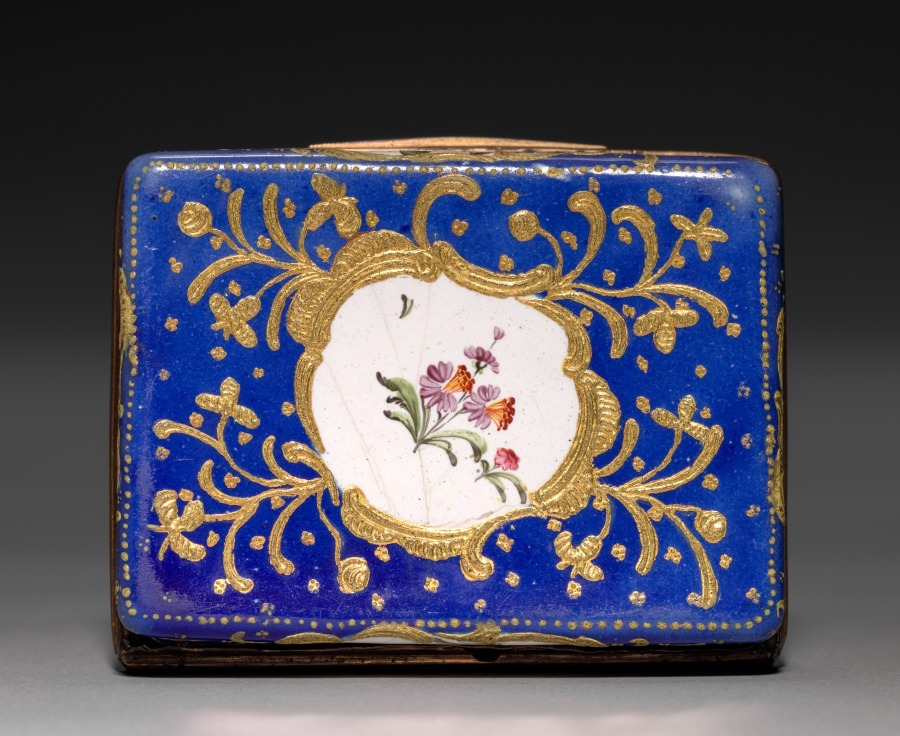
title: Snuff Box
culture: England, South Staffordshire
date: c. 1770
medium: enamel on copper, gilt metal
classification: Miscellaneous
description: Luxurious personal objects, like this snuff box, were an essential part of a privileged wardrobe during the 1700s and early 1800s, emphasizing their owner’s refinement and wealth. Their glittering surfaces, however, disguised a system based on the labor and suffering of enslaved or indentured people, whether in gold or stone mines, tobacco farms, or shops where these goods were made. Like cotton, sugar, and tea, snuff came from British colonies in America, India, and the Caribbean, where enslaved people were exploited to grow these crops under extremely harsh conditions. Slavery was not abolished in much of the British Empire until 1833. Britain and other European nations continued to pursue colonialism with a sense of superiority that found its way into all aspects of life, including decorative objects glorifying their conquests.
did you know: This small, elaborate box held snuff, a form of powdered tobacco that was inhaled in tiny amounts.